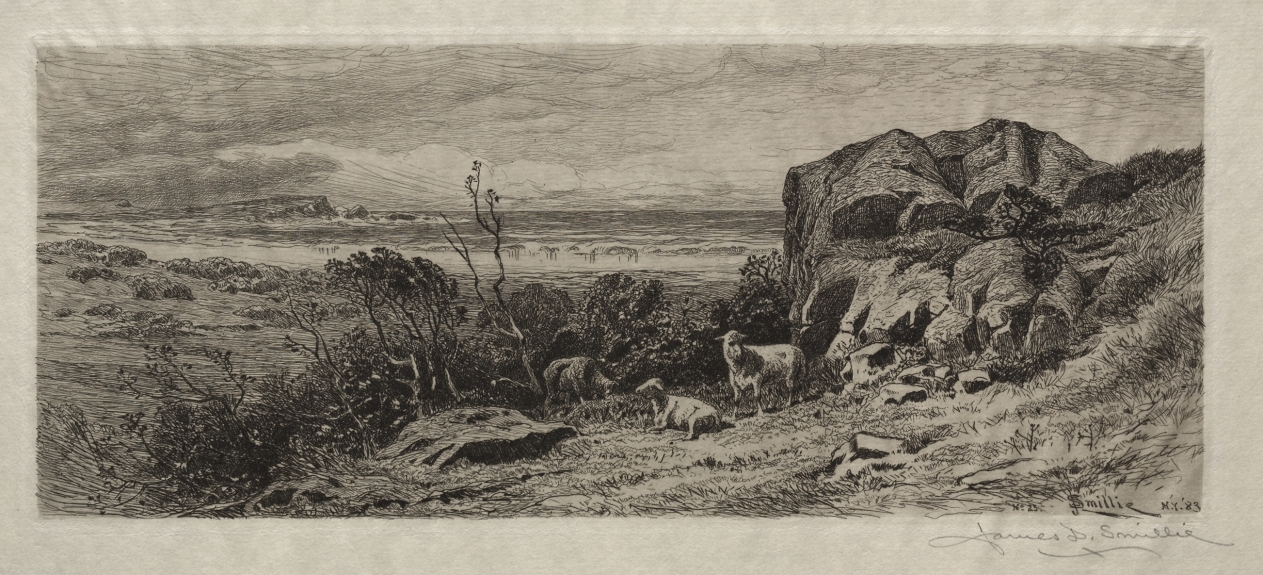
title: A Bit on Marblehead Neck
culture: America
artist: James David Smillie (American, 1833–1909)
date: 1883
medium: etching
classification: Print